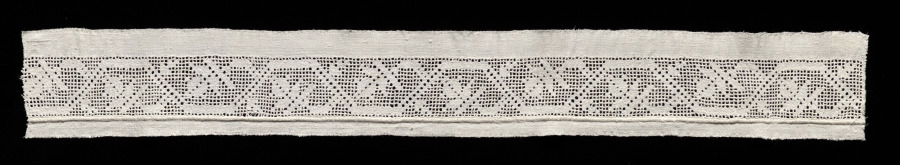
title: Lace Band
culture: Unassigned, 1800s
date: 1800s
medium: Cotton: needle lace (drawnwork)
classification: Lace